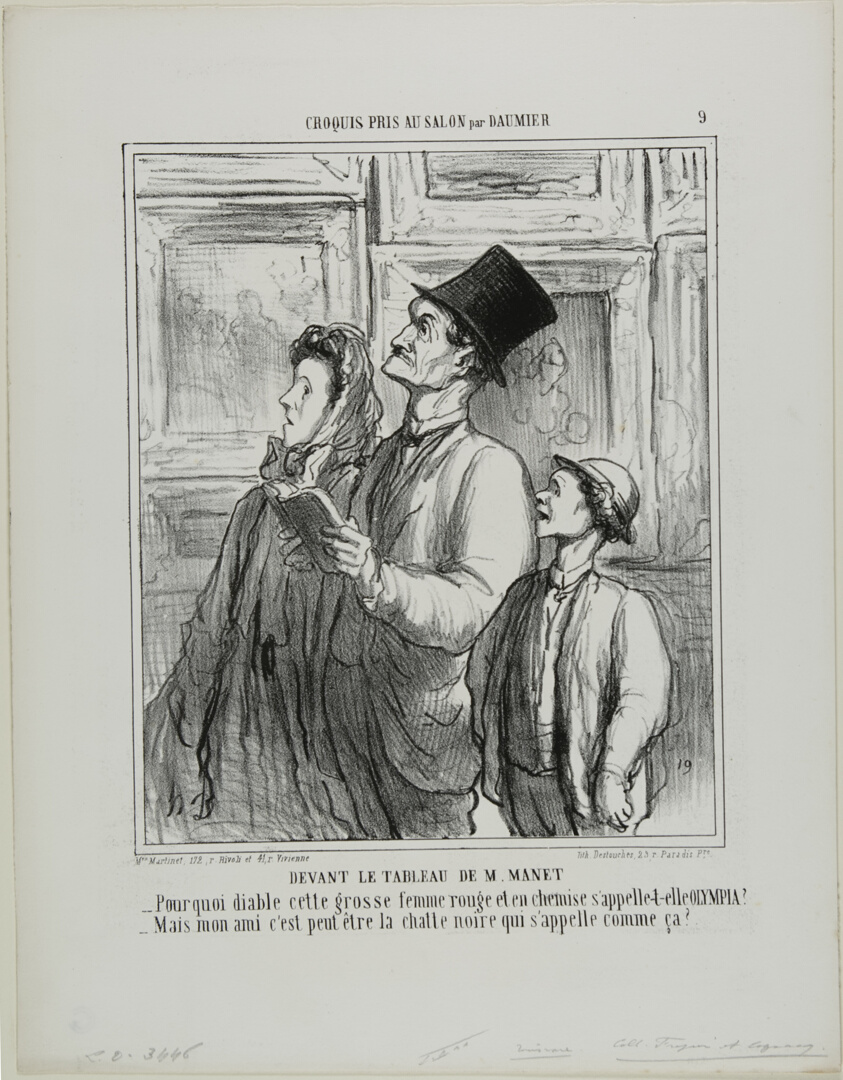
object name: Print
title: Looking at the Painting of Manet. “- Why the devil is this fat, red-faced woman in her nightdress called Olympia? - But my dear, perhaps that's the name of the black cat," plate 9 from Croquis Pris Au Salon par Daumier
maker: Honoré Victorin Daumier; French, 1808-1879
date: 1865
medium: Lithograph in black on white wove paper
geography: France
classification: lithograph; print; prints and drawing